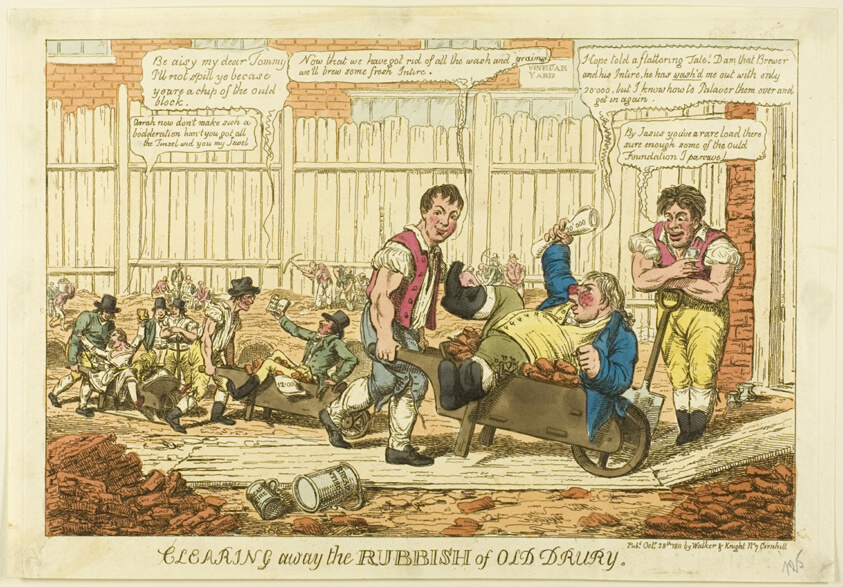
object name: Print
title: Clearing Away the Rubbish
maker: Charles Williams (English, active 1797-1830); published by John Walker (active, 1789 - 1813)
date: 1811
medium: Hand-colored etching on paper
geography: England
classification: etching; print; prints and drawing